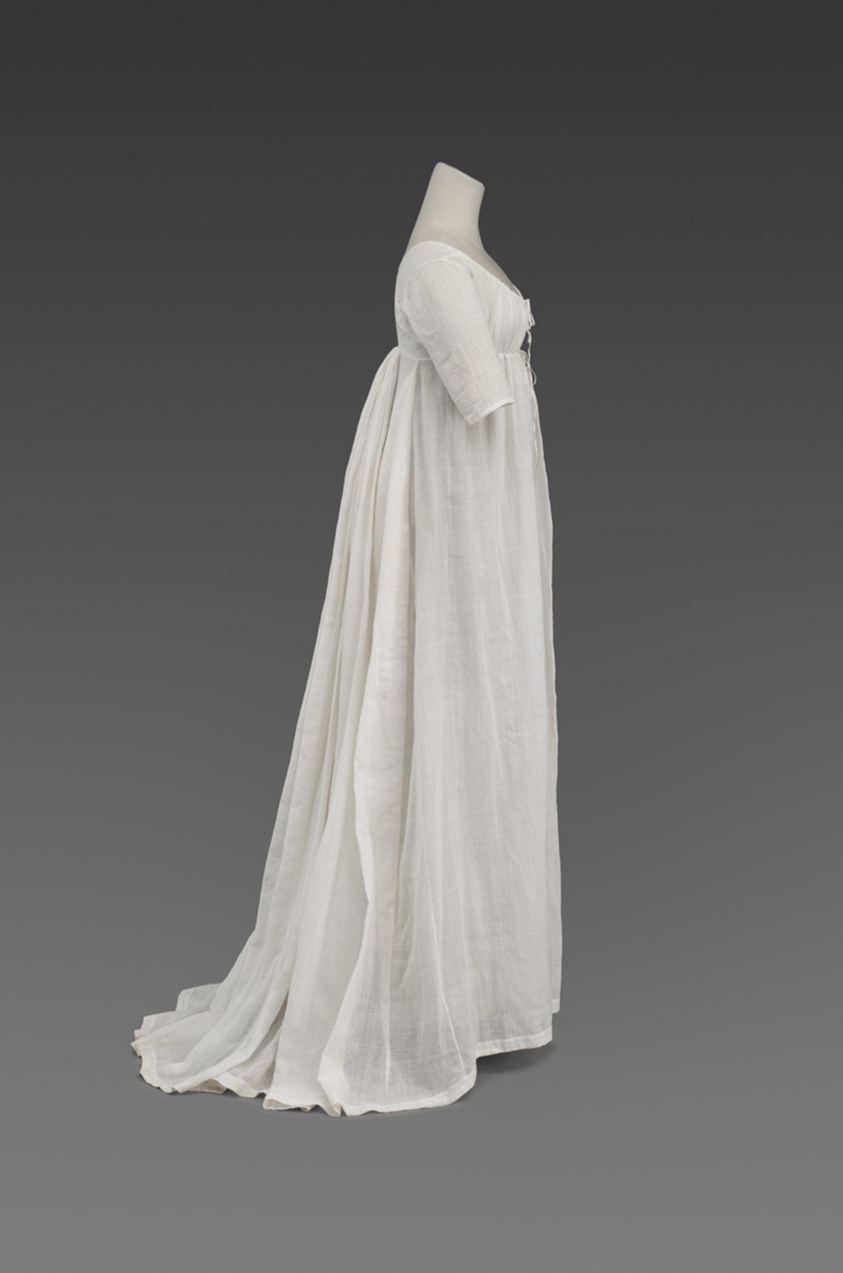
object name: Costume and Accessories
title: Woman's Day Dress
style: Neoclassicism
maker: Made in France with cotton imported from India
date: c. 1800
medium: Cotton, hand-spun, hand-woven plain weave called mulmul or muslin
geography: India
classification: costume; dress (garment); clothing; garment; textile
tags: dresses, fashion, garment, clothing, costume